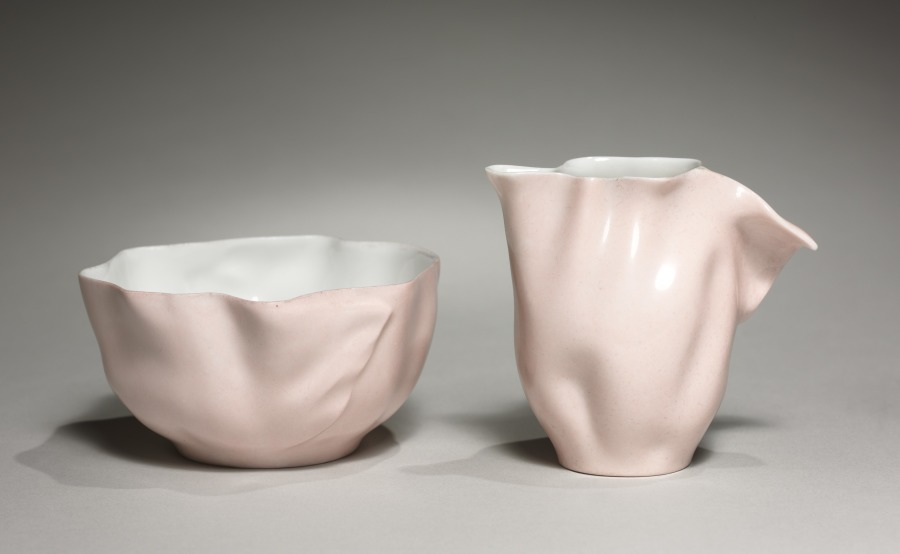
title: Service Aïda: Bowl and Pitcher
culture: France, Limoges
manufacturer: Jean Pouyat Factory (French)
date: c. 1880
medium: porcelain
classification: Ceramic